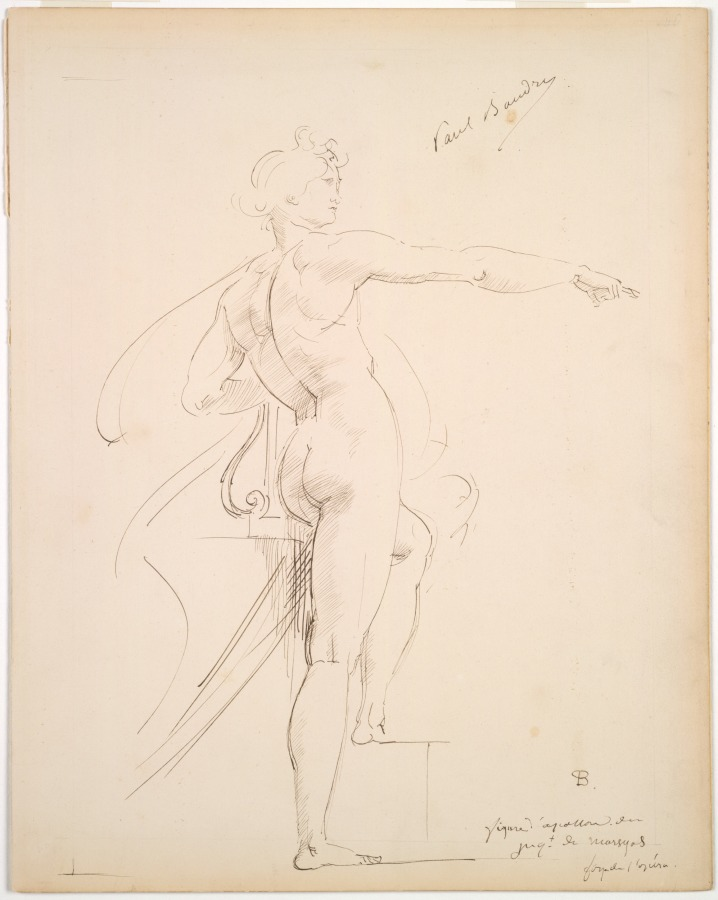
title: Study of Apollo for Marsyas (recto)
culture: France, 19th century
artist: Paul Baudry (French, 1828–1886)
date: late 1860s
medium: pen and brown ink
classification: Drawing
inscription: Monogrammed and inscribed in brown ink, lower right: B / figure d'Apollon du / jugt de Marsyas / foyer de l'opéra. Signed in brown ink, upper right center: Paul Baudry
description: When Paul-Jacques-Aimé Baudry was commissioned to create the ceiling paintings for the Grand Foyer of the new Paris Opéra in 1864, for inspiration he visited the Sistine Chapel frescoes by Michelangelo—completed more than 300 years earlier. This drawing depicts the god Apollo from behind, intended for a scene in which Apollo points to the satyr Marsyas, with whom he held a musical competition. The pose and figure type recall Michelangelo’s monumental sculpture of David, which Baudry would have also seen on his Italian journey.